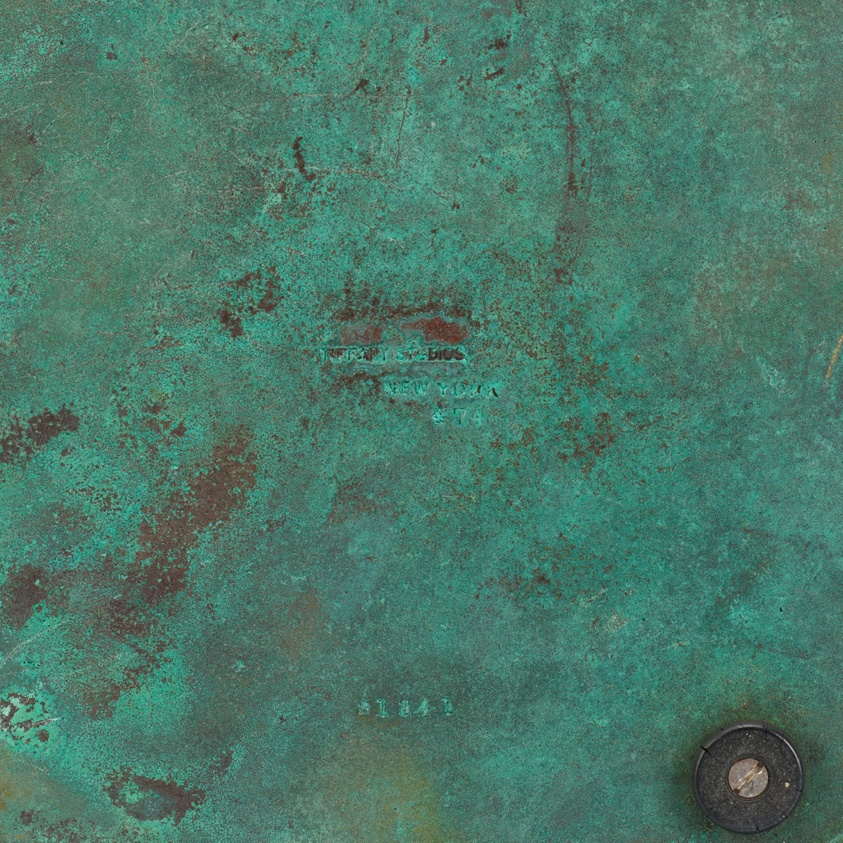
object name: Furnishings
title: Lamp with “Nasturtium” Shade and “Bamboo” Base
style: Arts and Crafts Movement, 20th Century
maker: Design attributed to Clara Pierce Wolcott Driscoll (American, 1861–1944); Tiffany Studios (American, 1902–32); Corona, New York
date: c. 1910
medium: Favrile glass and bronze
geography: Corona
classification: lamp (lighting device); american decorative arts; decorative arts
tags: Nasturtium, bamboo